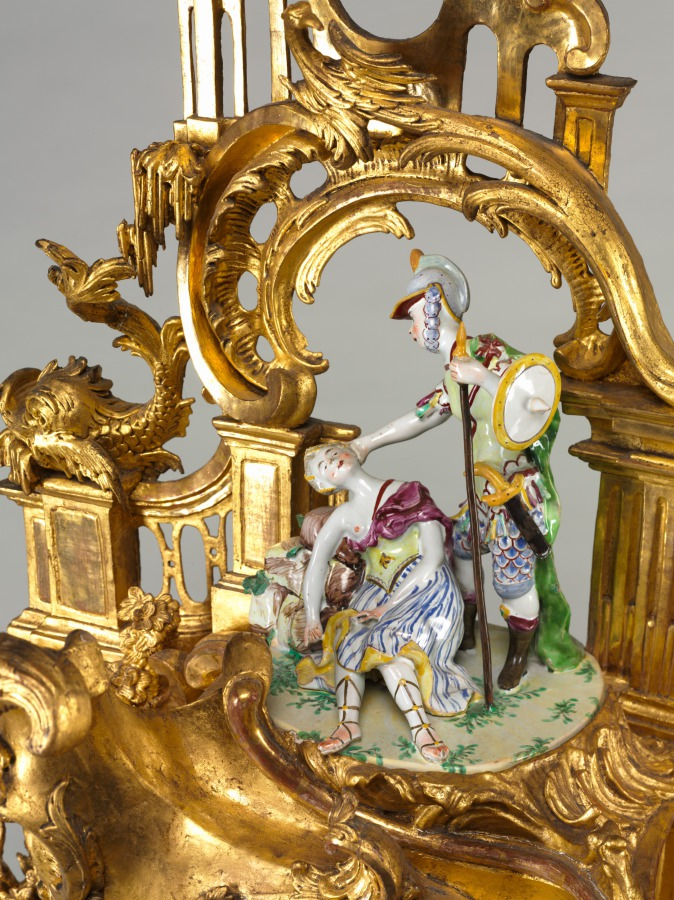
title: Clock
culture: Germany, 18th century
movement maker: Baumgartinger (German)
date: c. 1750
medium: carved and gilded wood, faience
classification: Furniture and woodwork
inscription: inscribed on face: Baumgartnger [sic] Mergentheim.